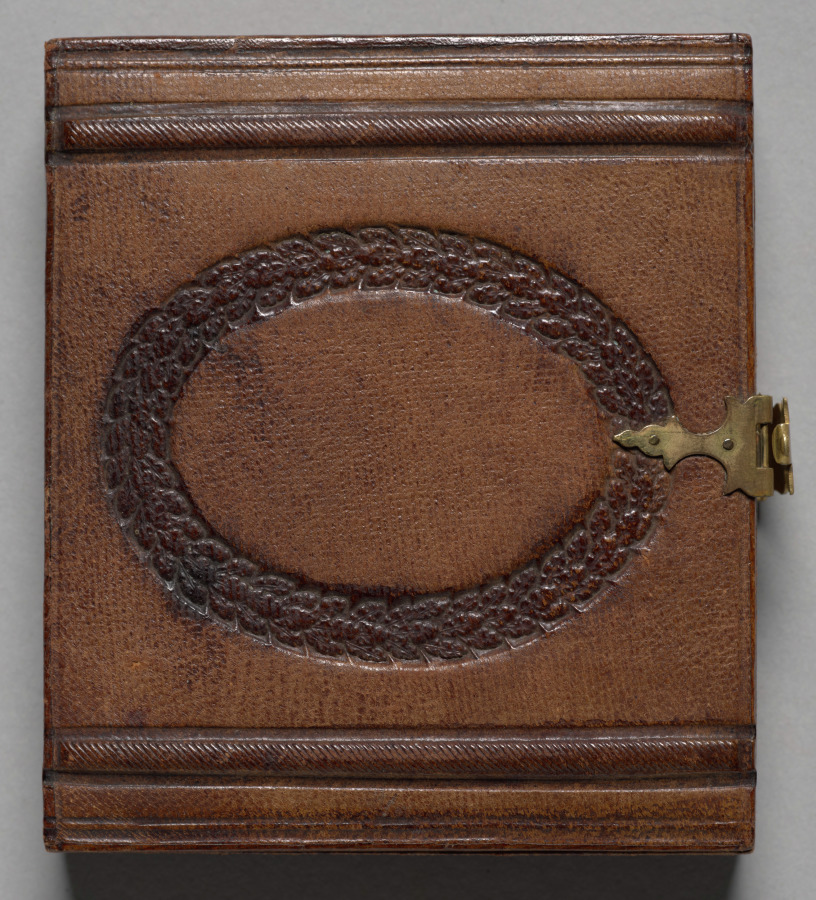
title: Seated boy in tasseled cap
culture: America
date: c. 1858–61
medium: ambrotype, sixth plate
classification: Photograph